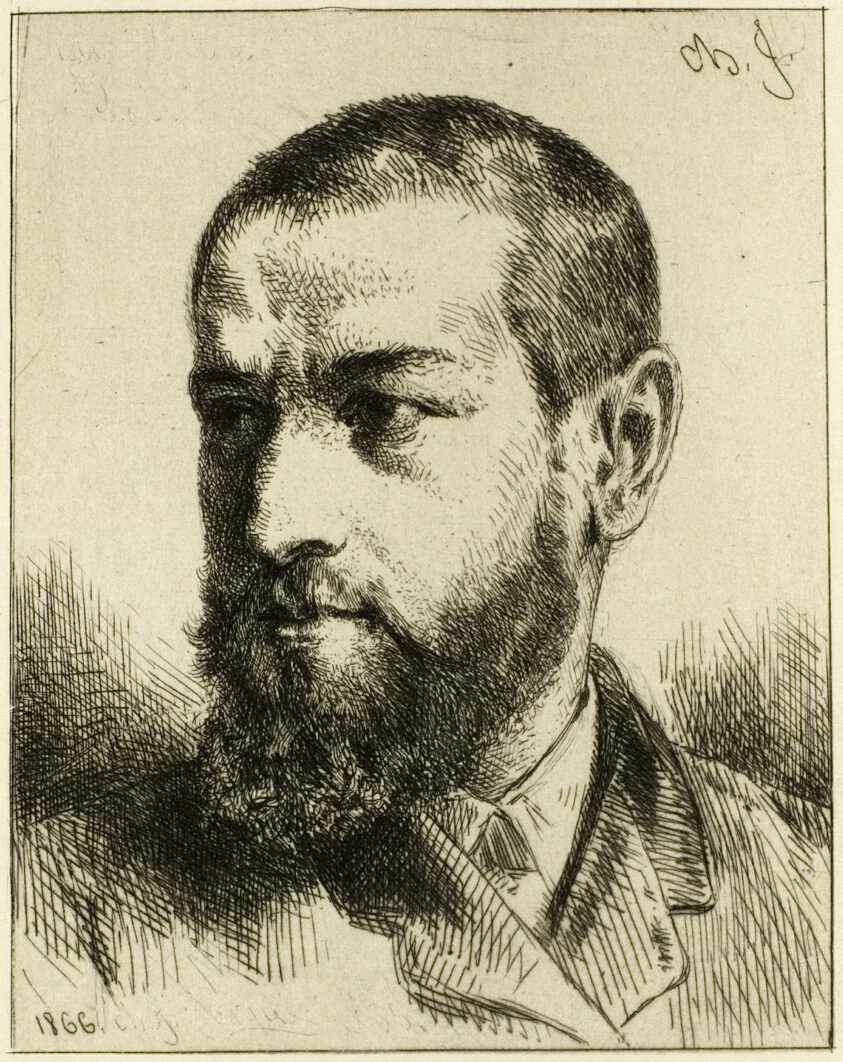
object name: Print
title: Portrait of J.J. Guiffrey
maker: Charles Émile Jacque (French, 1813-1894)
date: 1866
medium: Etching on ivory wove paper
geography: France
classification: etching; print; prints and drawing